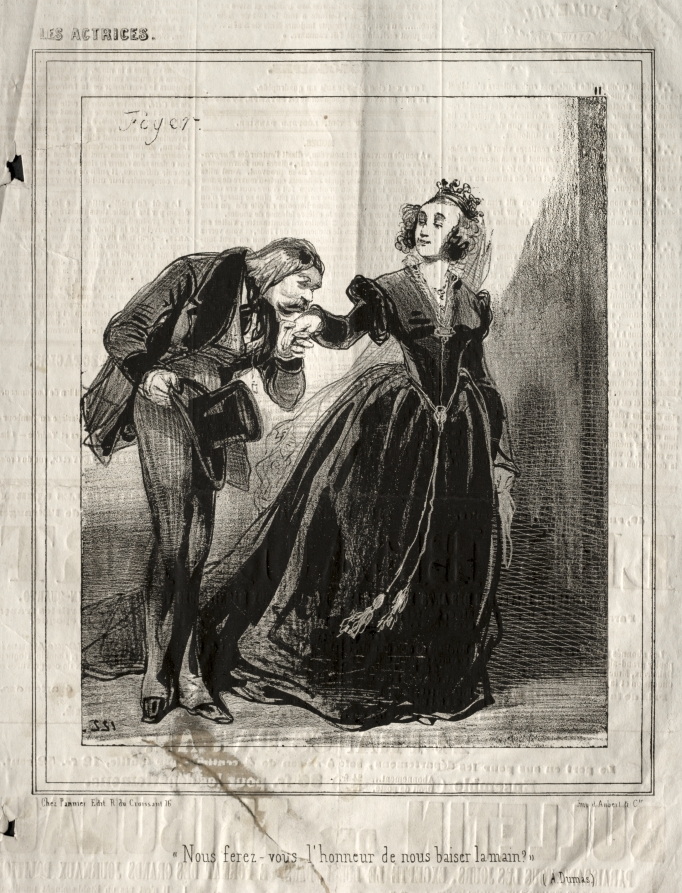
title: Les Actrices: Nous ferez-vous l'hommeur de nous baiser le main?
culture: France, 19th century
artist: Paul Gavarni (French, 1804–1866)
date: 1843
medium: lithograph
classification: Print